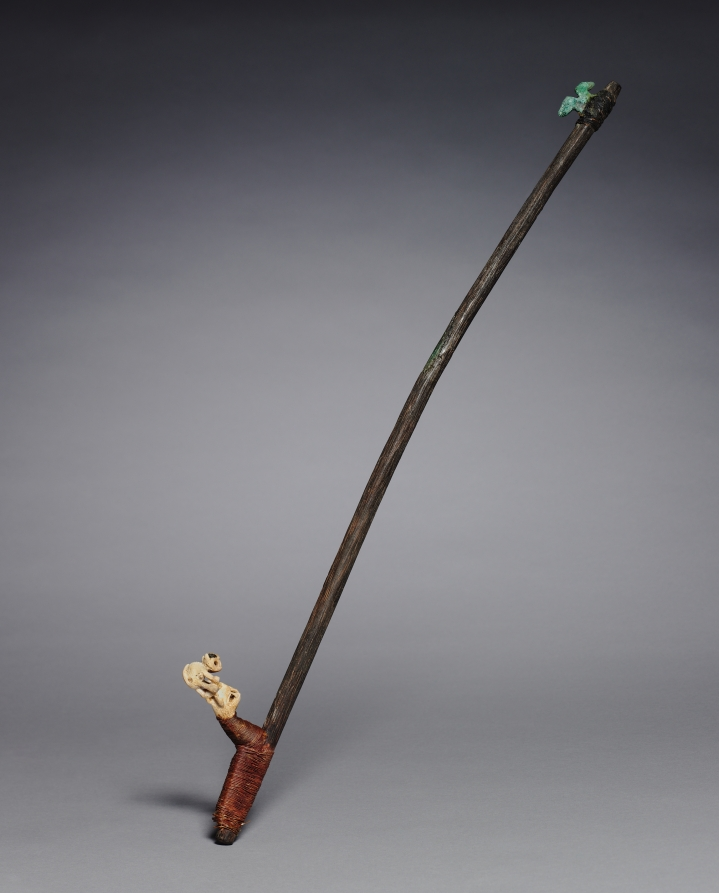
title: Spear-Thrower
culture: Peru, South Coast?, Middle Horizon?, 6th-10th Century?; modern assembly of ancient parts?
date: 600–1000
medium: wood, metal, bone, thread, sinew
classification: Arms and Armor